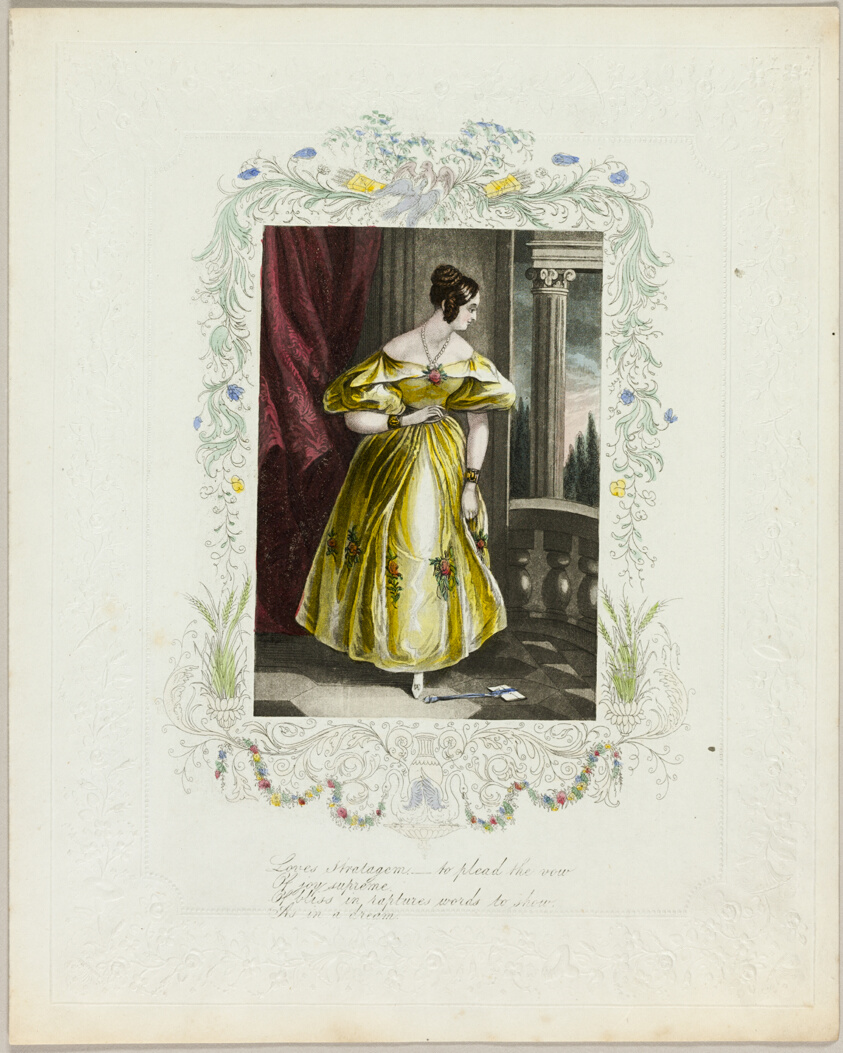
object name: Print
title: Love's Strategem (Valentine)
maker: Unknown Artist; English, 19th century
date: c. 1840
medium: Lithograph with hand-coloring on embossed off-white wove paper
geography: England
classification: valentine; prints and drawing; print